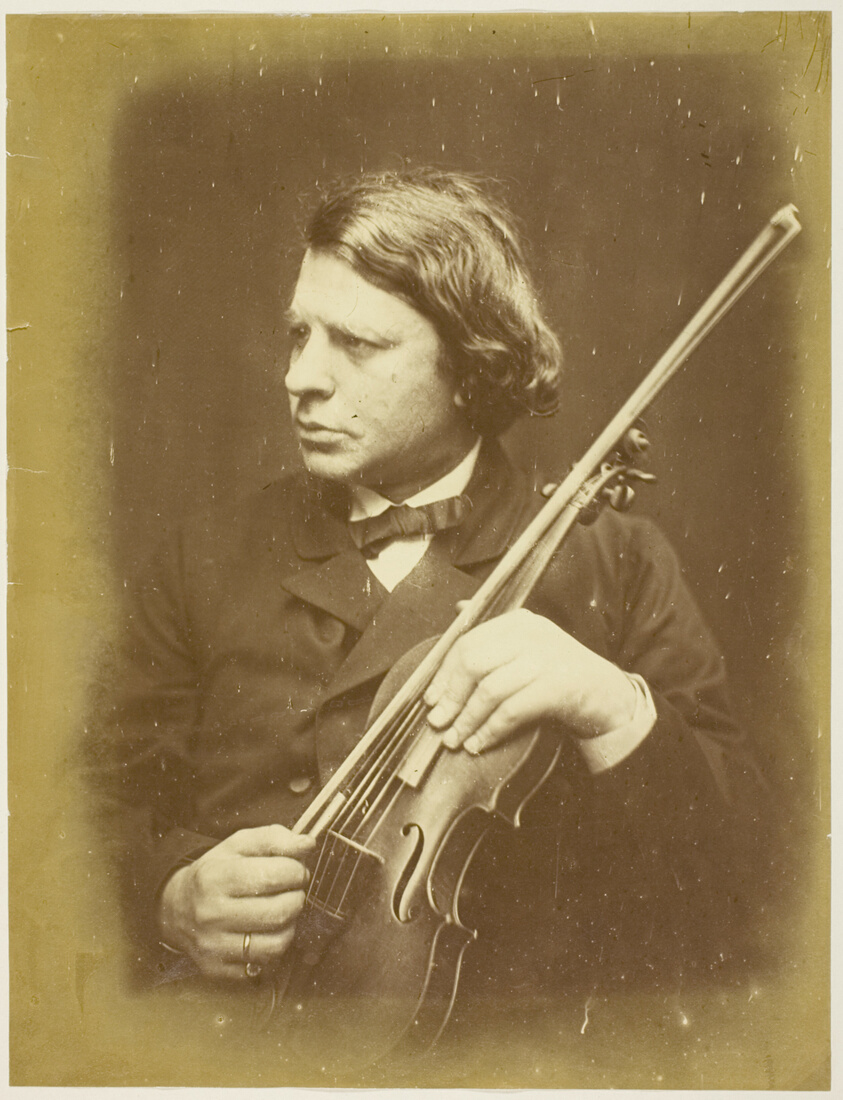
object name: Photograph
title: Mr. Joseph Joachim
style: 19th century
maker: Julia Margaret Cameron (English, 1815–1879)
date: 1868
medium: Albumen print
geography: England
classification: albumen silver print; photographic process; photography; photograph